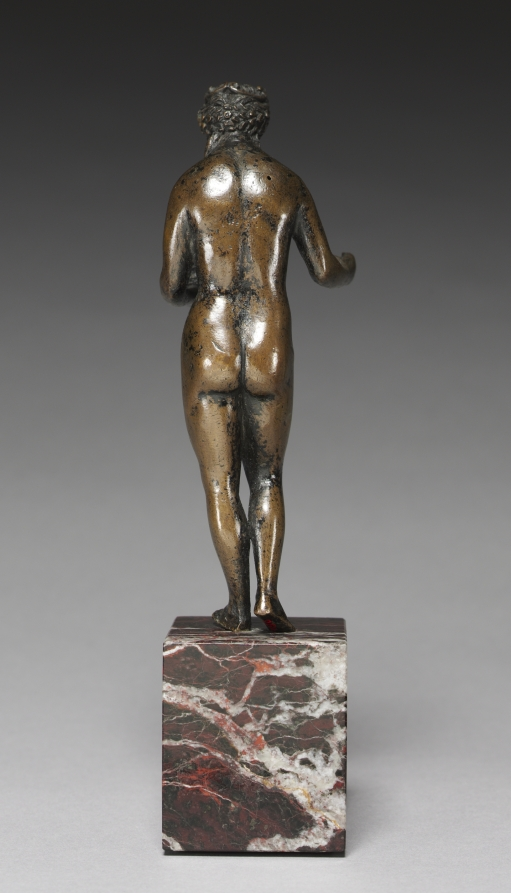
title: Pomona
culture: Italy, early 16th Century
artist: circle of Andrea Riccio (Italian, c. 1470–1532)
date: c. 1500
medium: bronze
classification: Sculpture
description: According to Roman mythology, the nymph Pomona cared for the gardens and forests, rejecting the pursuits of her suitors. The god Vertumnus fell in love with her. He disguised himself as an old woman, complimented her orchard and kissed Pomona passionately. As an old woman, Vertumnus explained that there was one person who loved both Pomona and her garden. Vertumnus then revealed himself to her, and from then on the two cared for Pomona's gardens together. Classicizing in style, Pomona stands nude with her weight on her left leg. She holds a bowl of fruit in her left hand while her right hand is clenched, suggesting it may have once held another object. Pomona wears a diadem, or headband, and hair decorated with a beaded garland falls in two locks over her shoulders. A hole has been drilled at the top of the figure's head for removal of the core and casting pins appear in the back of the right shoulder and on the front of the left leg. Other examples of this statuette exist in Oxford, Paris, Berlin and Washington. Only the Washington and Cleveland versions have been attributed to Riccio because of their superior quality of casting and the rich patinas.